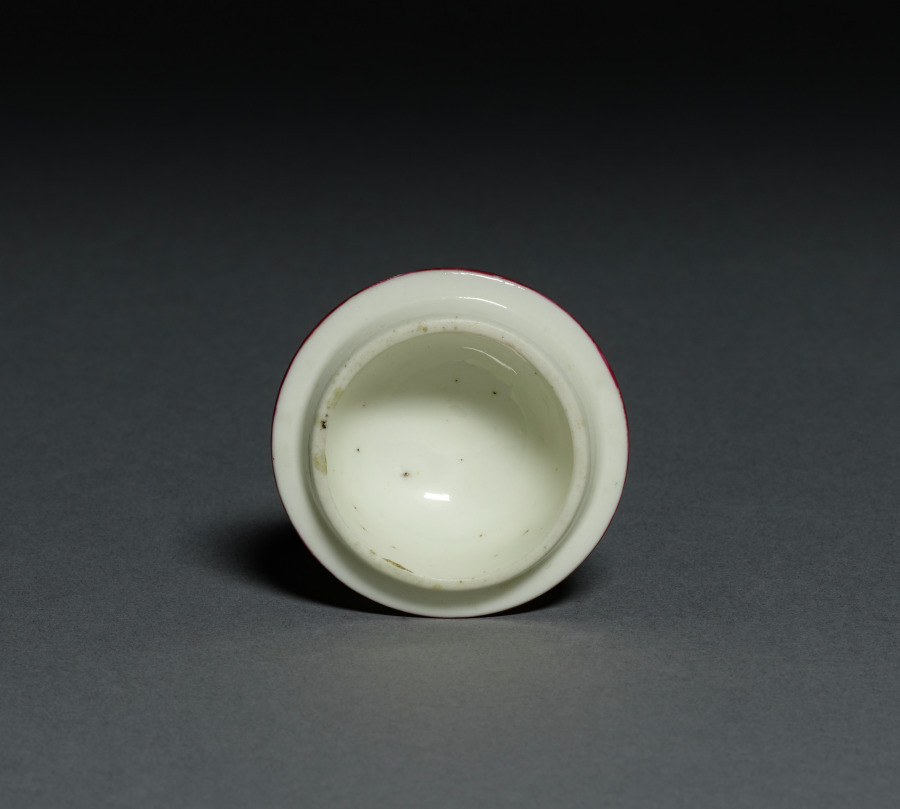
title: Cover for a Custard Cup (pot à jus)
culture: France, Mennecy, 18th century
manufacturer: Mennecy- Villeroy Factory (French)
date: c. 1750–55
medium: soft-paste porcelain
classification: Ceramic